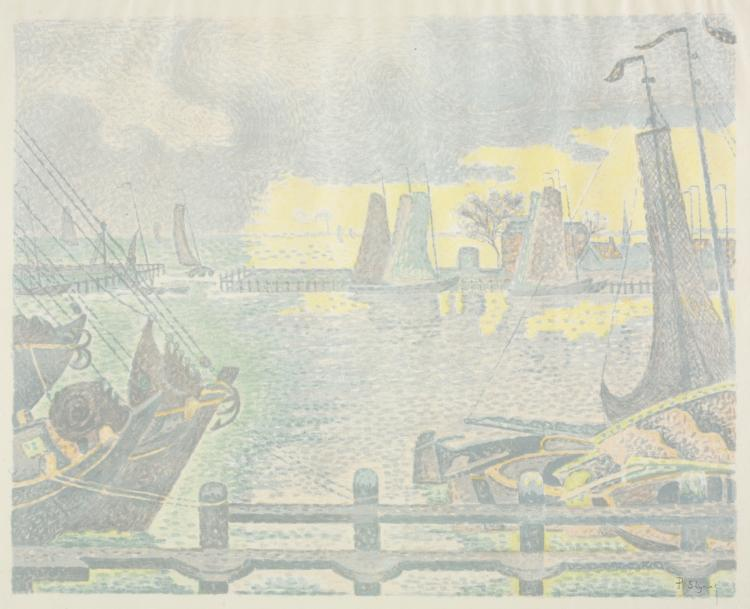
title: Boats at Flushing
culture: France, late 19th-early 20th century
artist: Paul Signac (French, 1863–1935)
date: 1895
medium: lithograph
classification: Print